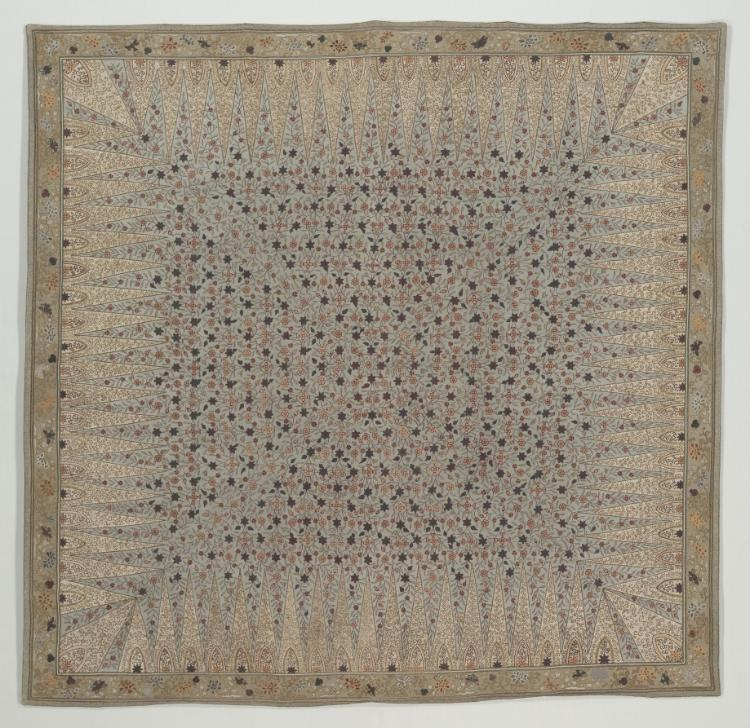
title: Hanging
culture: China, Qing dynasty (1644-1911)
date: 1850–1916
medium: silk, embroidery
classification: Embroidery